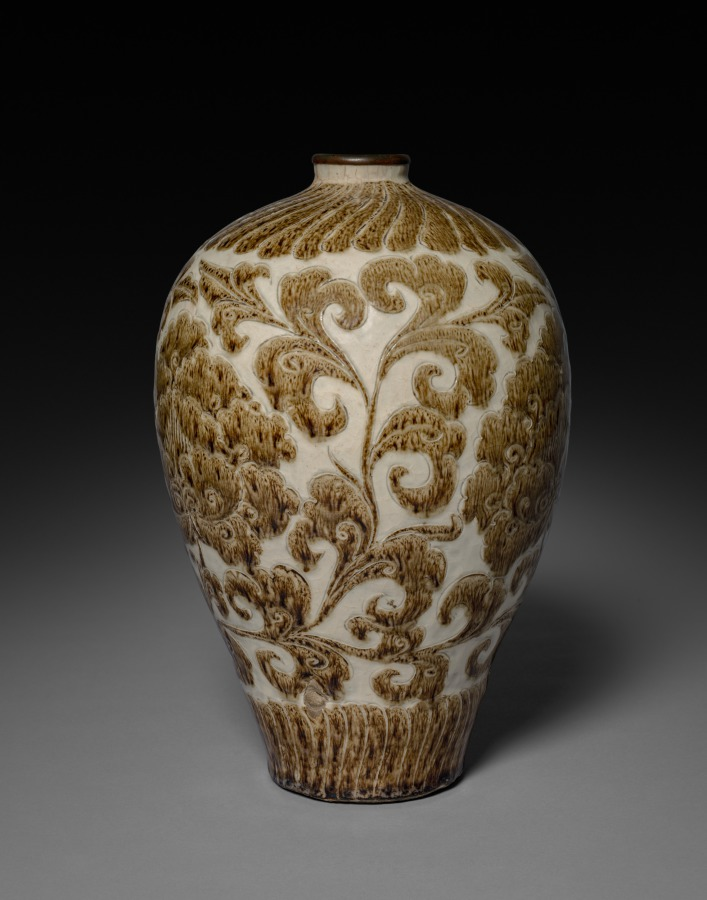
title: Meiping Vase: Cizhou Ware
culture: China, Northern Song dynasty (960-1127)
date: 1100s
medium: Buff stoneware with carved underglaze slip decoration, Cizhou ware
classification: Ceramic